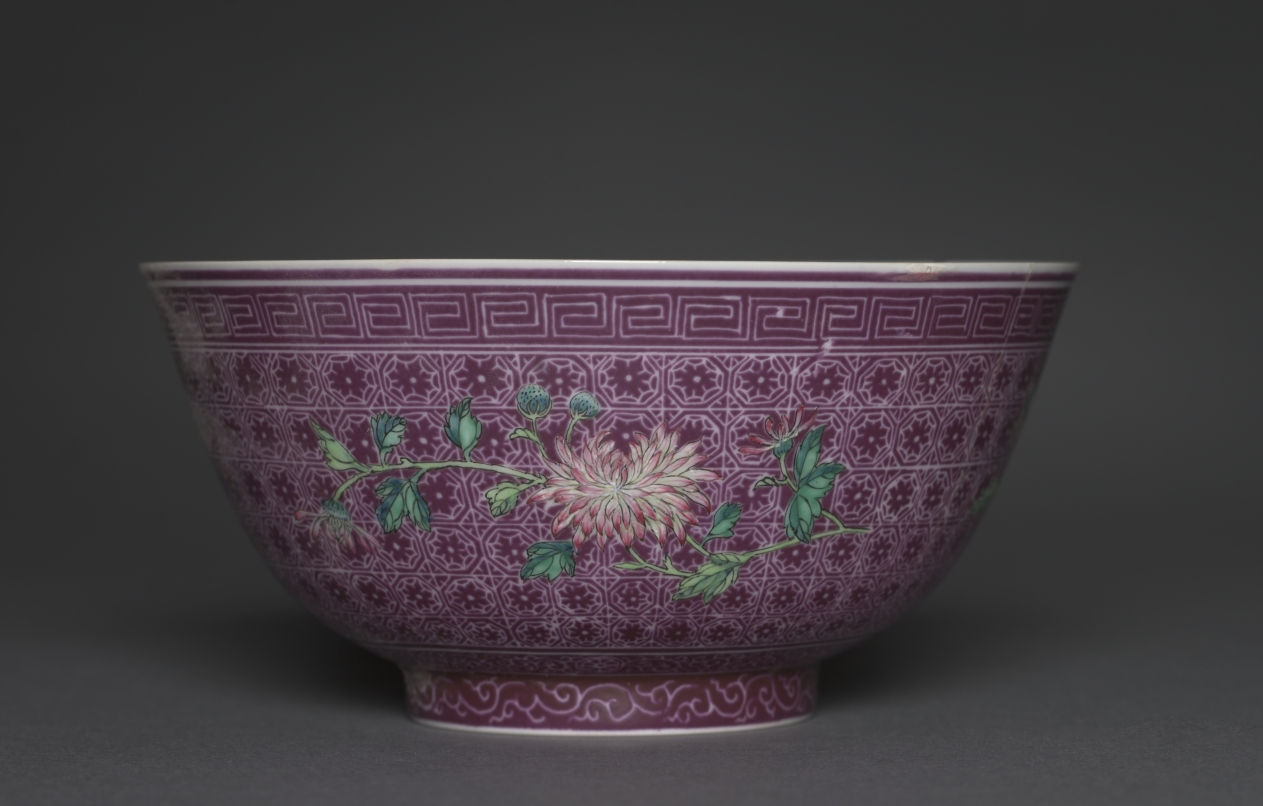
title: Bowl with Peony Sprays on Diaper Ground (exterior); Chrysanthemum Sprays (interior)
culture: China, Jiangxi Province, Jingdezhen, Qing dynasty (1644–1911), Qianlong mark and reign (1736–95)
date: 1736–95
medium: porcelain with famille rose overglaze enamel decoration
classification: Ceramic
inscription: 乾隆年製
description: The production of extraordinarily refined Qing imperial wares such as these could have involved the transportation of undecorated, plain porcelains from the imperial kilns in Jingdezhen, Jiangxi province, to the palace workshops in Beijing, where court painters applied the polychrome enamel decoration. The Qianlong reign mark on the base of the bowl is written with blue enamel over the transparent glaze.